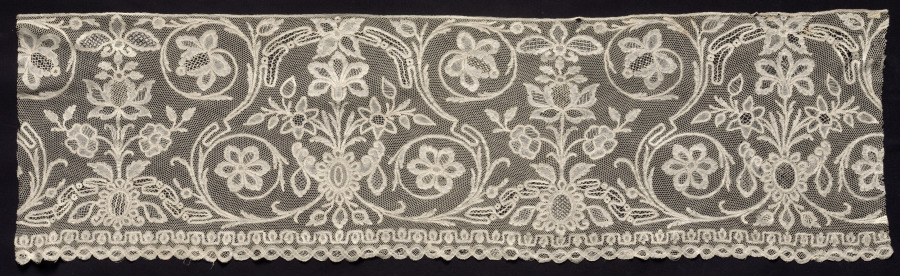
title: Lace Flounce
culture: Belgium, Brussels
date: 1600s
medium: Linen: bobbin lace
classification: Lace